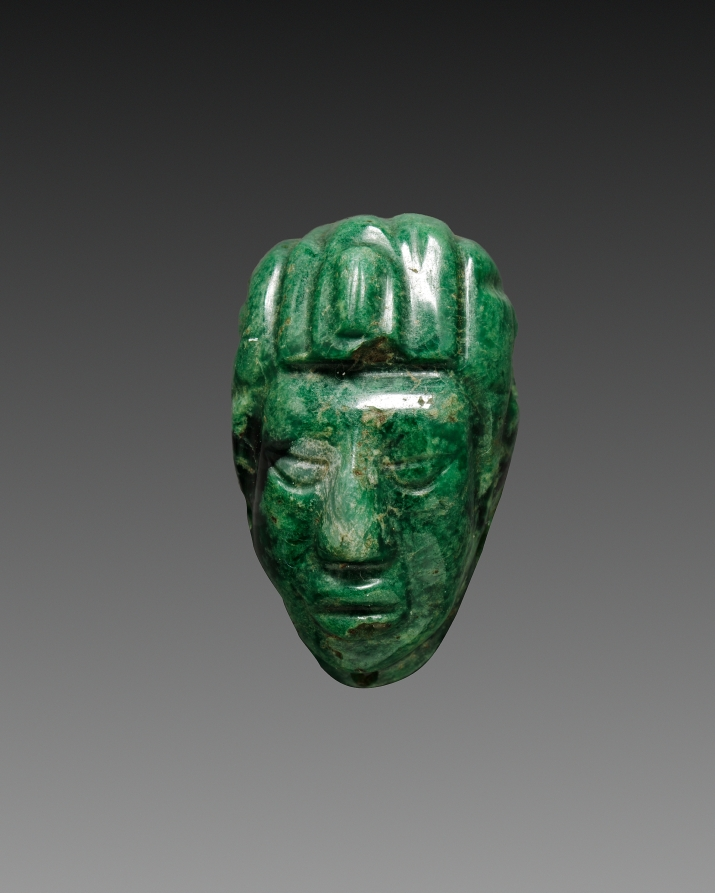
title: Head Ornament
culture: Mexico, Chichén Itzá, Maya, 7th-10th Century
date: c. 600–900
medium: jade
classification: Jade